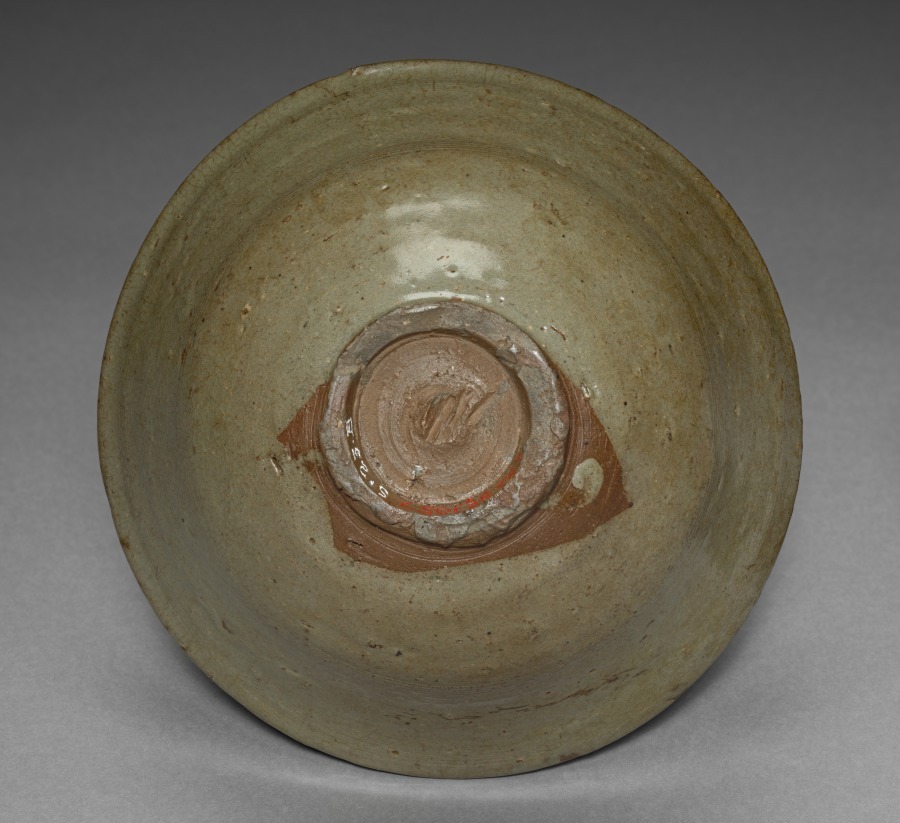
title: Bowl with Stamped Floral Decoration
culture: Korea, Joseon dynasty (1392–1910)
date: 1400s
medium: glazed ceramic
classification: Ceramic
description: This type of wide-mouthed bowl was used every day in Korea, not exclusively for tea drinking. But when it was introduced to Japan around the early 16th century, its imperfect appearance evoking the aesthetics of wabi-sabi caused it to be repurposed as a tea bowl. Korean tea bowls were circulated as an item of foreign luxury among Japanese military elites. Many Korean potters were abducted to japan during the Japanese invasions (1592–98) and some settled down in Japan, particularly in the Saga prefecture in Kyushu. A Japanese tea bowl such as 1983.158 in the CMA collection is one example possibly created by the descendants of dislocated Korean potters.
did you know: This type of humble tea bowl was highly praised among Japanese collectors for its imperfect beauty.